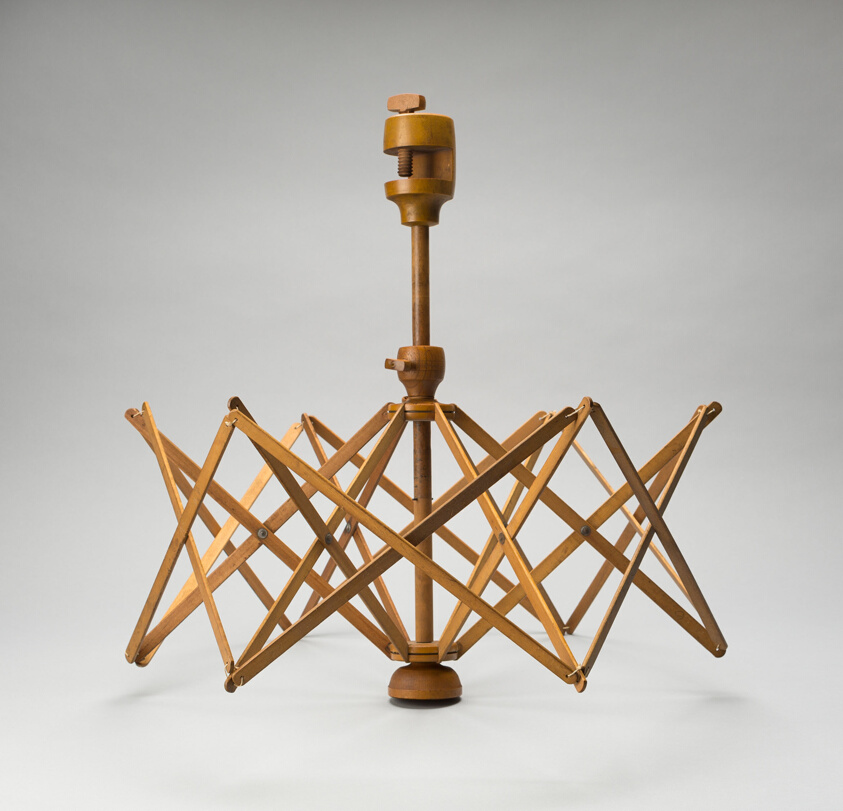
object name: Decorative Arts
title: Swift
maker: Artist unknown (American, Shaker, active 19th century)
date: 1840–50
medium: Maple, birch, iron, and cotton twine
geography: Enfield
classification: wood; swift (textile working equipment); american decorative arts; american arts; decorative arts